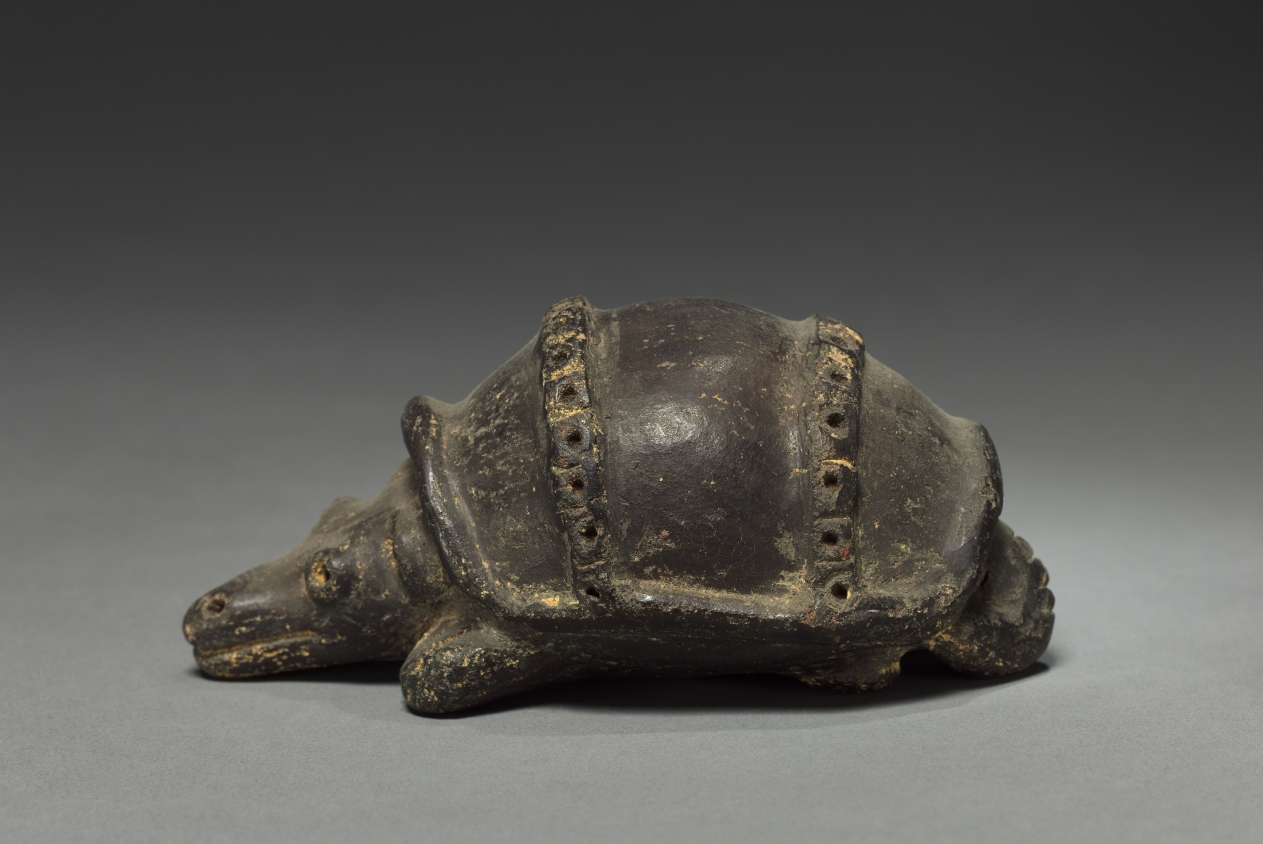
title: Armadillo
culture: Colombia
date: before 1921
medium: pottery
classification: Ceramic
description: Rattles that combine ravens, humans, and frogs are among the best known but least understood of the Northwest Coast object types. They clearly have mythic import and may have originated as shamans’ implements. But historically chiefs used them during secular parts of winter dances.